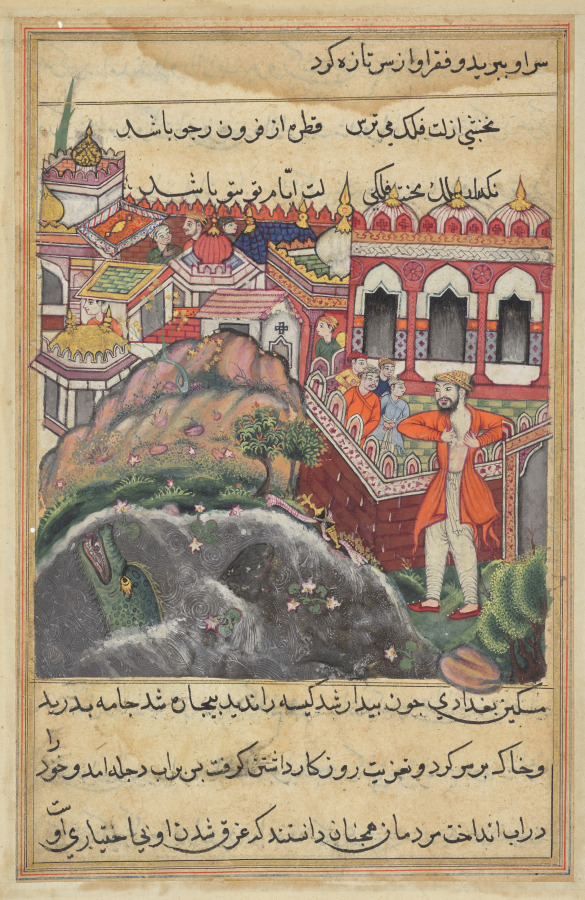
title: The bag of gold which he received for the slave girl being stolen in a mosque, the young man of Baghdad tears his cloths and is about to fling himself into the Tigris, from a Tuti-nama (Tales of a Parrot): Forty-eighth Night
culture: Mughal India, court of Akbar (reigned 1556–1605)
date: c. 1560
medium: gum tempera, ink, and gold on paper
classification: Painting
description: In the foreground, the distraught young man stands at the edge of the rushing river. Desperate for money, he has sold his lover, a slave girl, but finds himself destitute again. A group of onlookers watch the distressed man from the courtyard in front of the mosque. They will jump into the water to save him before he can drown.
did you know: Gigantic fish and a crocodile lurk in the swirling waters of the Tigris.